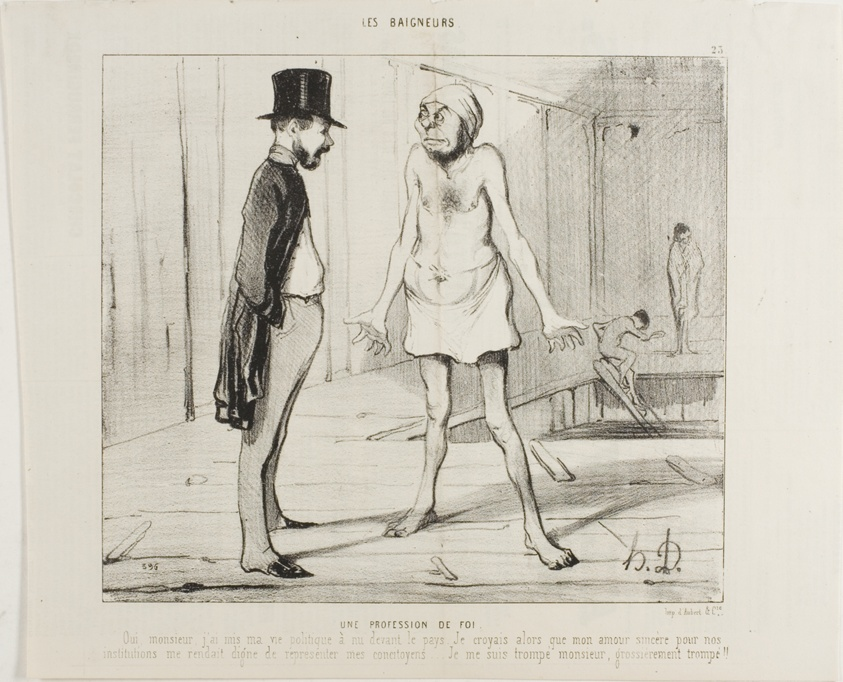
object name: Print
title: A Confession Of Faith. “Yes Sir, I bared my political life in pure sincerity before my country. I was convinced that my true love for our institutions would make me worthy of representing my fellow citizens. I was wrong, Monsieur, it seems the nation wasn't ready for this yet,” plate 23 from Les Baigneurs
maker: Honoré Victorin Daumier; French, 1808-1879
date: 1842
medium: Lithograph in black, with scraping on stone on white wove paper, with letterpress verso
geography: France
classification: lithograph; print; prints and drawing